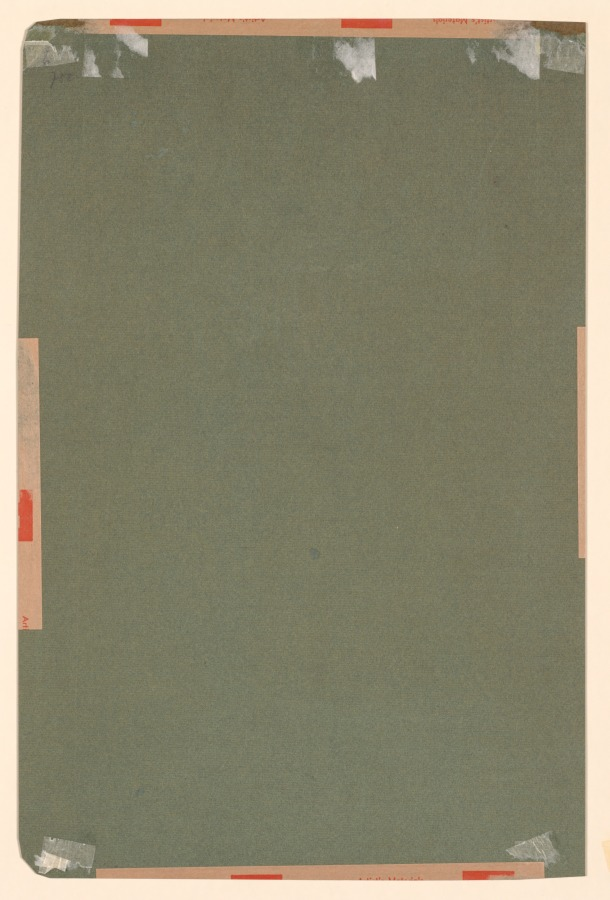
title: Babur receives booty and Humayun’s salute after the victory over Sultan Ibrahim in 1526, from an Akbar-nama (Book of Akbar) of Abu’l Fazl (Indian, 1551–1602)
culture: Mughal India, court of Akbar (reigned 1556–1605)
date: c. 1596–1597 or 1604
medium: Gum tempera and gold on paper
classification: Painting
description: The first Mughal emperor Babur sits enthroned as men bring gifts and sacks of tribute to mark a successful expansion of his territories. Emblematic of his role in leading the victory, his son Humayun wears a wine-and-gold robe of honor despite the Delhi heat in late April. Marking the royal space are a carpet and canopy painted with a lapis lazuli ground. The floral vine motif called arabesque swirls around a central lobed medallion. These delicate patterns are inspired from Persian manuscript illuminations. Contemporary historians describe awnings of gold embroidery, brocade, and velvet along with colorful carpets resembling a beautiful flower bed.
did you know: A clerk records the amount of tribute that Babur received from conquered kings.